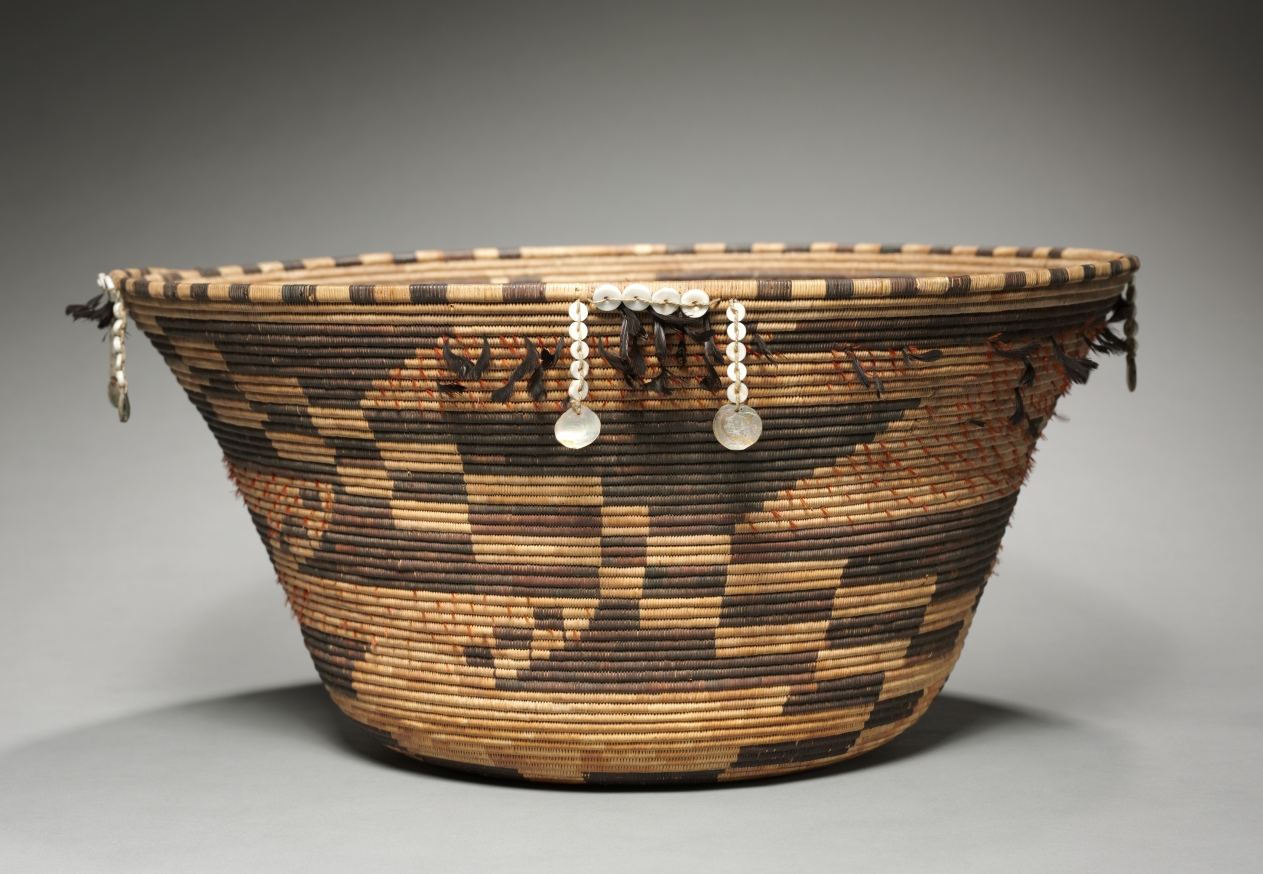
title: Puberty Basket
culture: California, Pomo, late 19th century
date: 1890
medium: coiled, quail and woodpecker feathers, shell, abalone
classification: Basketry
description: This finely woven basin is based on a traditional form that young Pomo women used to wash themselves after ceremonial seclusion following their first menses. The example on display, however, was made for the outside market.